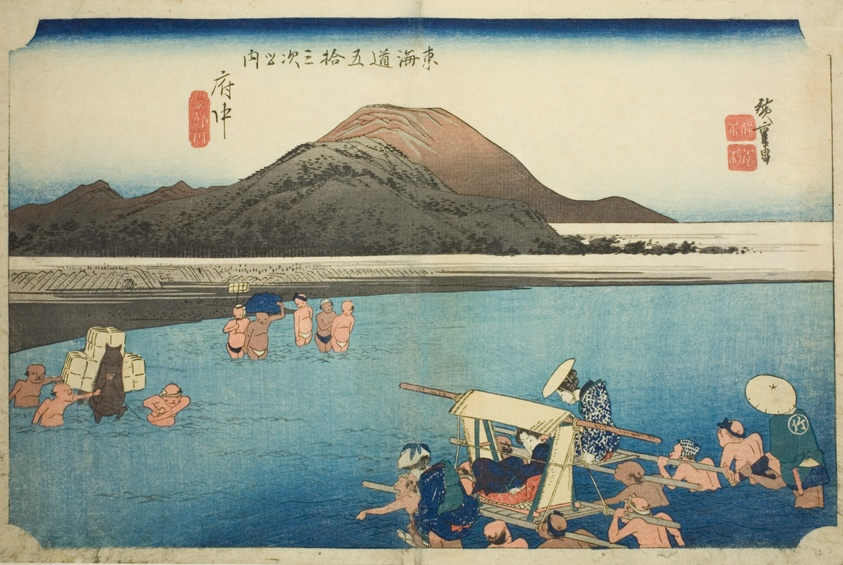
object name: Print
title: Fuchu: The Abe River (Fuchu, Abekawa), from the series "Fifty-three Stations of the Tokaido Road (Tokaido gojusan tsugi no uchi)," also known as the Hoeido Tokaido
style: Japanese (culture or style)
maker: Utagawa Hiroshige 歌川 広重; Japanese, 1797-1858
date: c. 1833/34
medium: Color woodblock print; oban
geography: Japan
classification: woodblock print; print; asian art